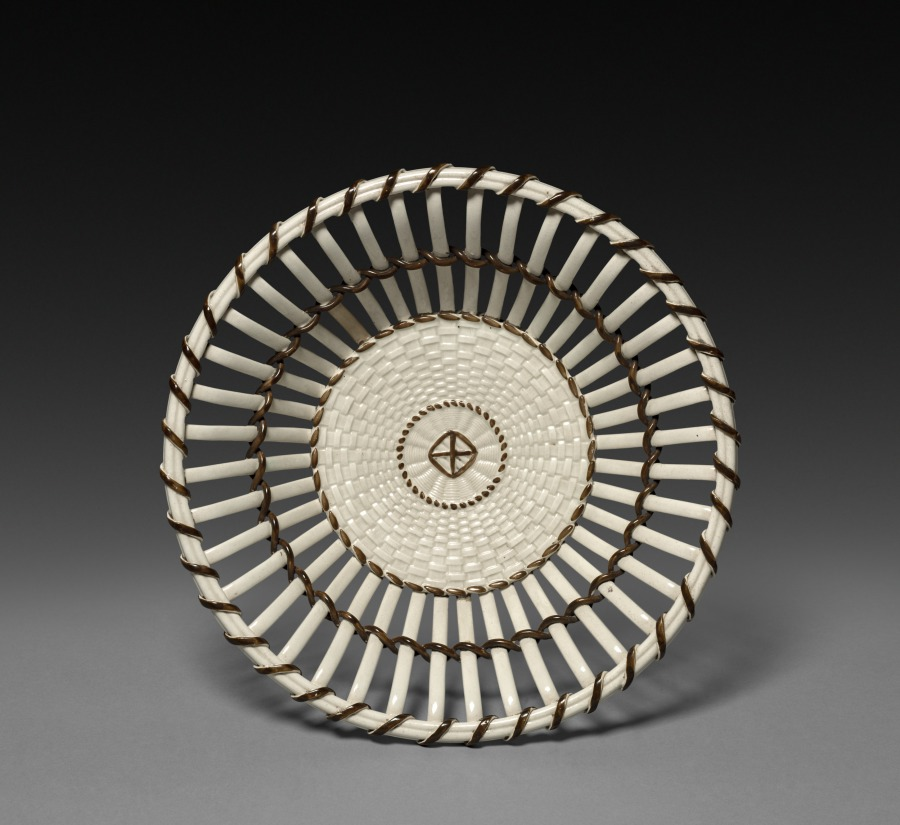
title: Bowl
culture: England, Staffordshire, 18th century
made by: Wedgwood Factory (British)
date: late 1700s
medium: cream-colored earthenware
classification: Ceramic